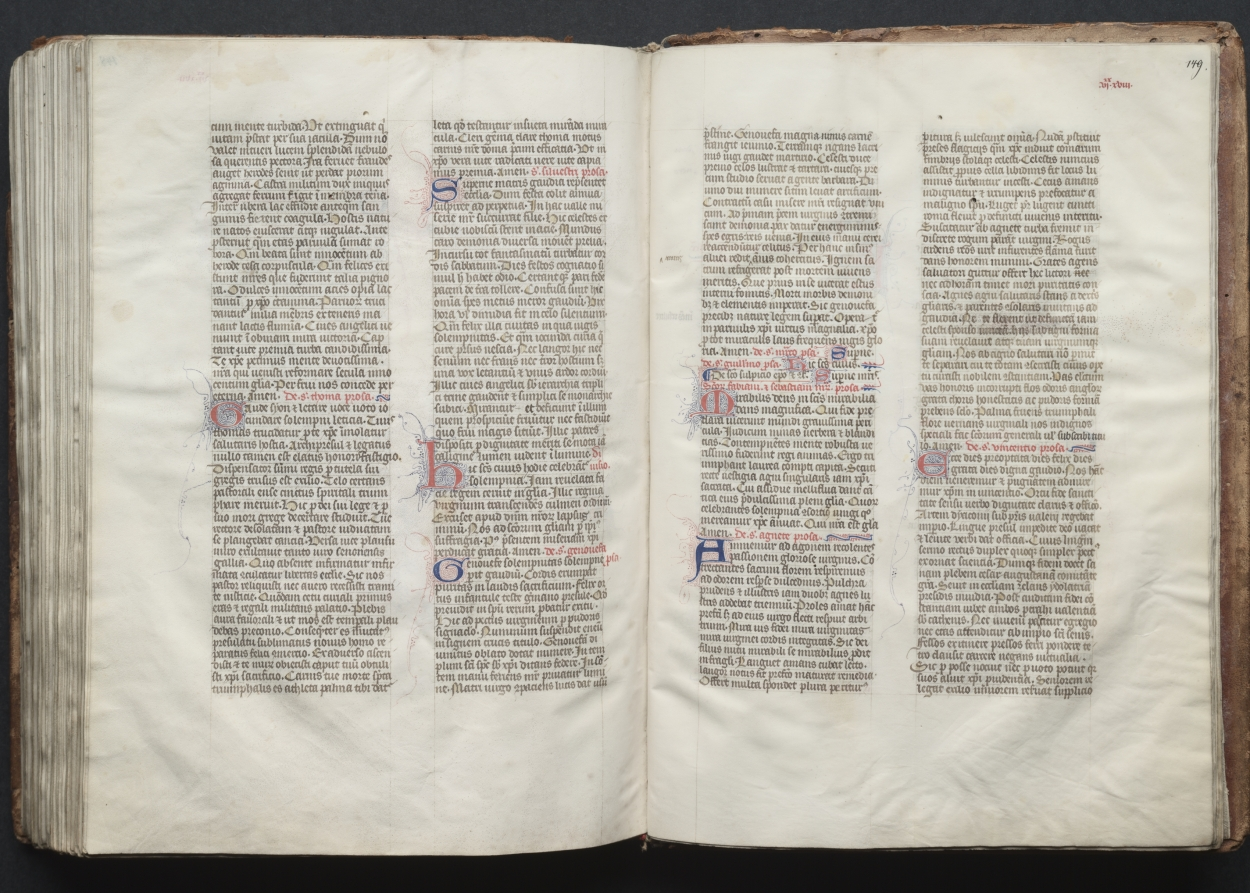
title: The Gotha Missal: Fol. 148v, Text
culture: France, Paris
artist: Master of the Boqueteaux (French)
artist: and Workshop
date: c. 1375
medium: ink, tempera, and gold on vellum; blind-tooled leather binding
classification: Bound Volume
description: The style and quality of this manuscript's decoration is typical of deluxe Parisian books made for aristocratic or royal patrons. Most of the book's decoration appears to be the work of the Master of the Boqueteaux, an artist active at the court of King Charles V (died 1380). His style was apparently shared by a number of book illuminators working in and around Paris. It is very possible that the Gotha Missal belonged to Charles V, but is not provable because the manuscript has no royal portraits and lacks a colophon. Given the book's magnificent decoration, however, it would seem that it was produced for a Valois prince, if not for the king himself. The manuscript receives its name from the German dukes of Gotha, its later owners.